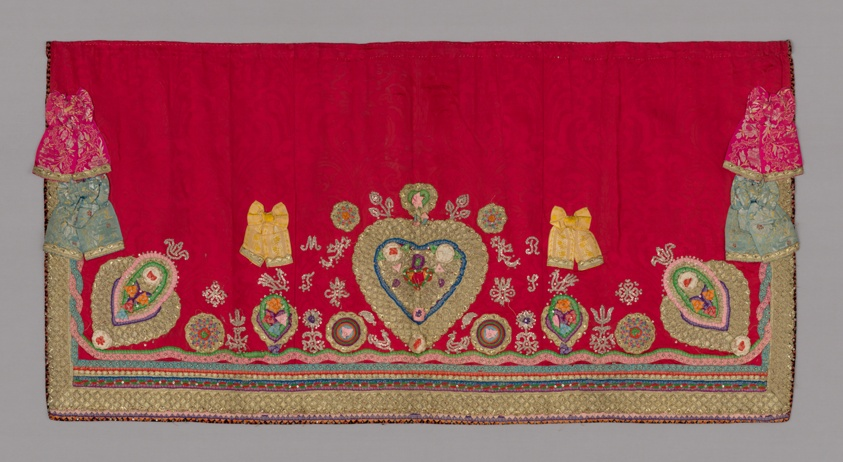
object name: Textile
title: Altar Frontal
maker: Germany, Bavaria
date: 19th century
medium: Silk and metal threads, lace, sequins, rosettes, and beads, damask weave; embroidered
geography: Bavaria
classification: textile; costume; needlework (visual works)